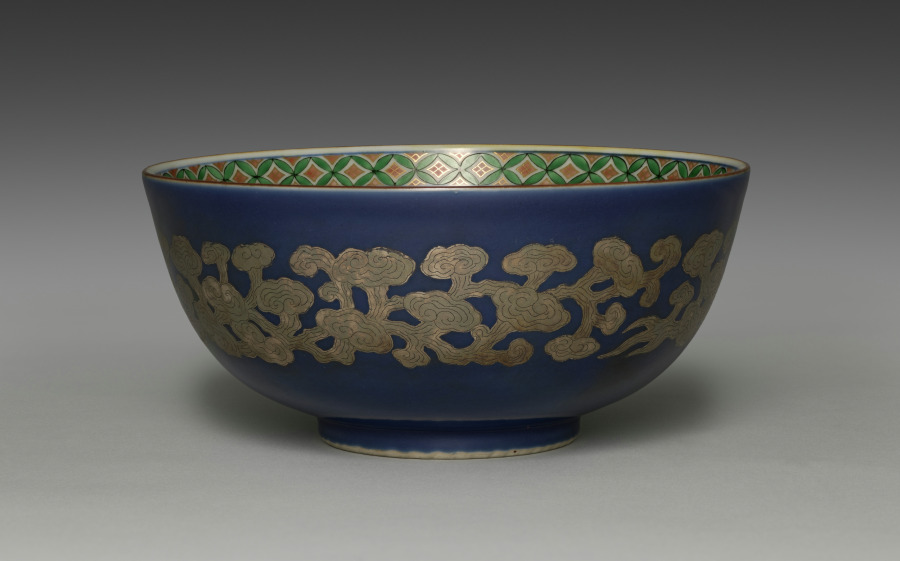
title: Bowl with Numinous Fungi and Kirin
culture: Japan, Meiji period (1868–1912)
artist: Seifū Yohei III (Japanese, 1851–1914)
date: 1893–1900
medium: Porcelain with cobalt blue glaze, overglaze color enamel, and silver painting overlay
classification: Ceramic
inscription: 清風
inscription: 清風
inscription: 帝室技芸員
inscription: 清風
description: The complex design of this bowl is also technically sophisticated in its execution. On the interior, Yohei III has placed a mythical beast called a kirin (Chinese, qilin) within a double-banded circle painted in cobalt blue under the glaze. Around the interior of the mouth, bordered at top and bottom with underglaze blue under a brown iron oxide painted rim, he has painted a continuous coin pattern with a red wash and green color enamels. The pattern is further defined and embellished with black iron outlining the green- and gold-painted diamonds over the diluted red. The inside is otherwise left white. On the exterior, the body has a dark blue glaze and an overlaid silver design of reishi with incised lines for detail.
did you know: Inside the bowl is an auspicious, mythical deerlike creature called kirin in Japanese (麒麟 or qilin in Chinese).